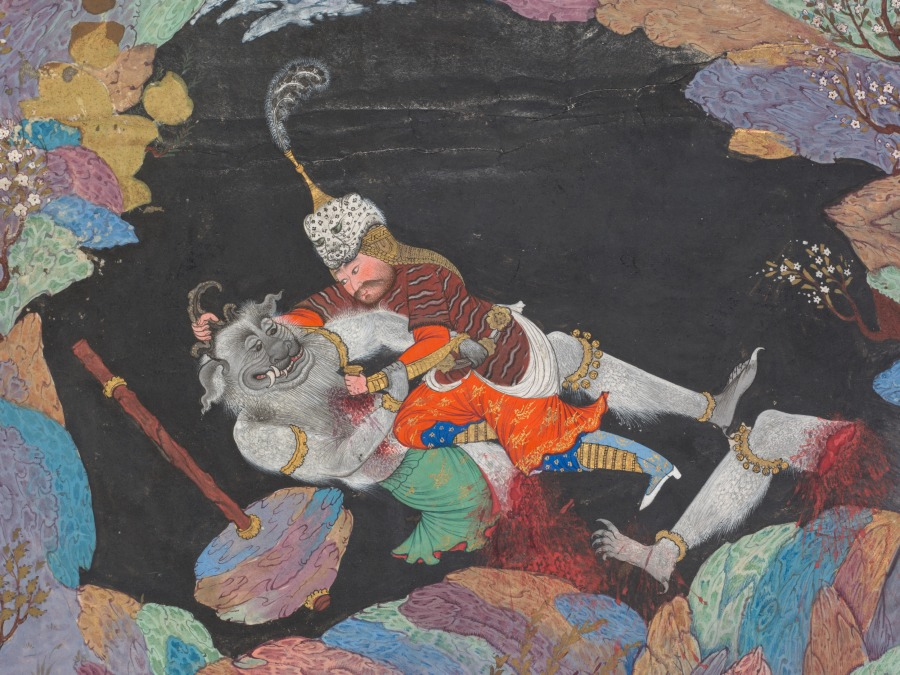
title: Rustam's seventh course: He kills the White Div, folio 124 from a Shah-nama (Book of Kings) of Firdausi (Persian, about 934–1020)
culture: Iran, Tabriz, Safavid period (1501-1722)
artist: attributed to Abd al-Vahhab (Persian, active about 1516)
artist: attributed to Mir Musavvir (Iranian, c. 1510–1555)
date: 1522–37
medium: Gum tempera, ink, gold, and silver on paper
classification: Manuscript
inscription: Script: Nasta'liq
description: The legendary hero Rustam brutally takes the demon chief’s liver blood, needed to cure his king of blindness. Paintings from the Shah-nama made for the Persian ruler Shah Tahmasp (reigned 1524–76) were acclaimed in their day for their brilliant coloring and refinement. Seven of the artists who contributed to this book moved to India to lead the new Mughal painting workshop in the 1550s. They introduced to the Indian artists a more complex color sensibility and preference for presenting faces in three-quarter view, as opposed to in profile.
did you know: Devils in the details: three peer into the White Div’s lair by the Caspian Sea.